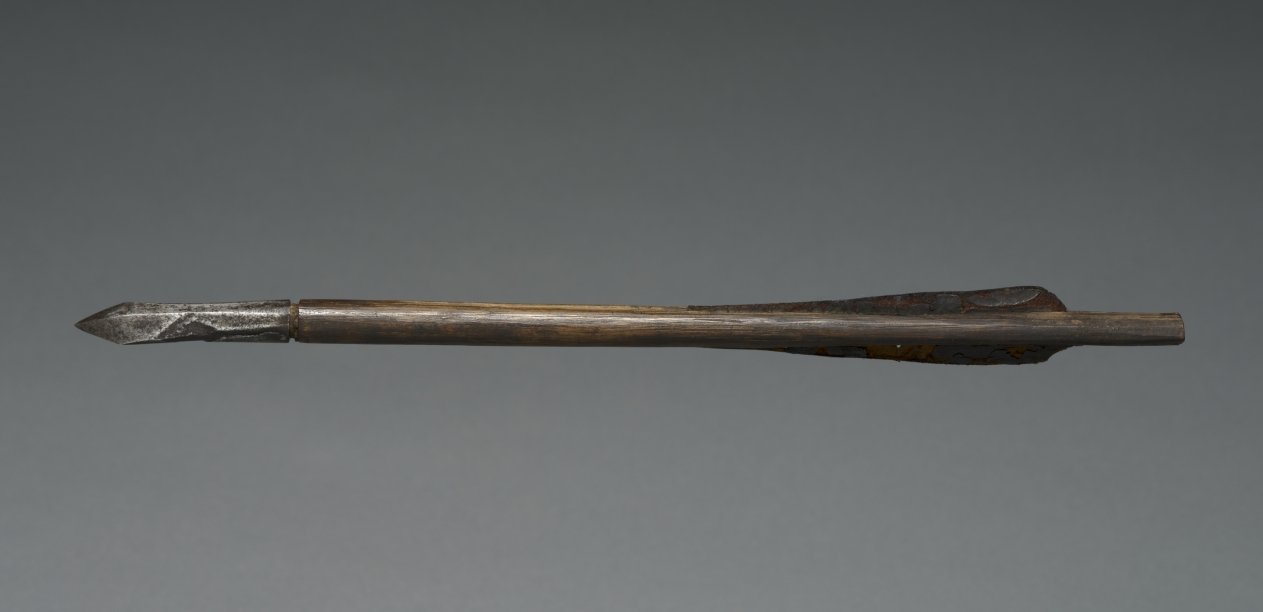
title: Crossbow Bolt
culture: Germany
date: 1500s–1600s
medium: wood, leather, steel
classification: Arms and Armor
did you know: Bolts with leather feathering were used mainly in the Tyrolean area, which includes northern Italy and western Austria.